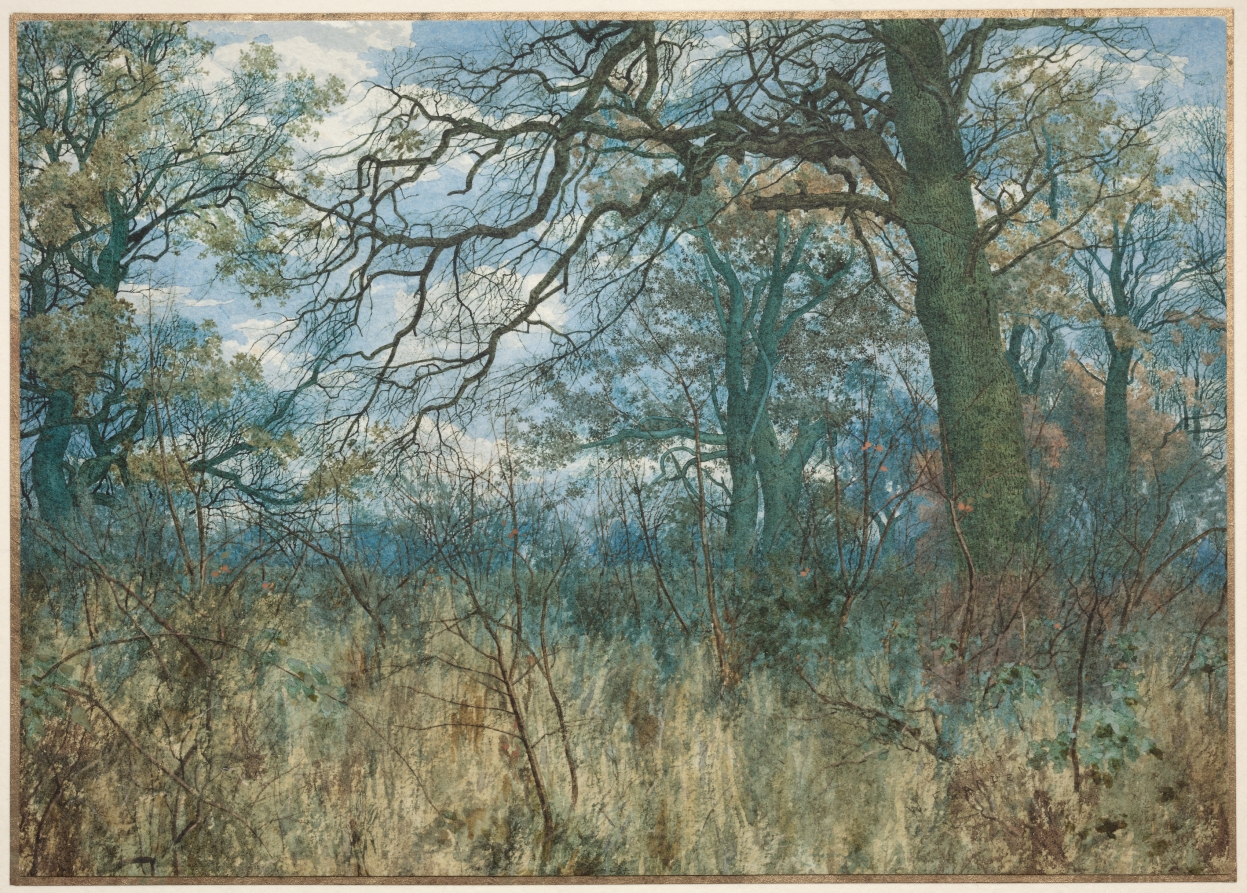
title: Trees and Undergrowth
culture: England, 19th century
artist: Garden William Fraser (British, 1856–1921)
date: 1885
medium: watercolor with gouache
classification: Drawing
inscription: signed and dated, in brown watercolor, at lower right: 1885 / W.F. Garden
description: William Fraser Garden’s work was based on the rendering of minute detail with painstaking brushwork and handling of color. Here, he describes an insignificant corner of the Bedford landscape: a tangled thicket in which dry grasses and saplings commingle. Bare branches stretch across a bright blue sky, creating a pattern as intricate as a spider’s web. This may have been the drawing that Garden exhibited at the Royal Academy in 1885 with the title Early Spring in the Woods. A pale green haze in the grass, the azure sky, and scattered wildflowers suggest the promise of spring.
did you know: Although William Fraser Garden received critical recognition for his watercolors early in his career, he lived and worked in relative obscurity and was plagued by financial troubles for most of his life.